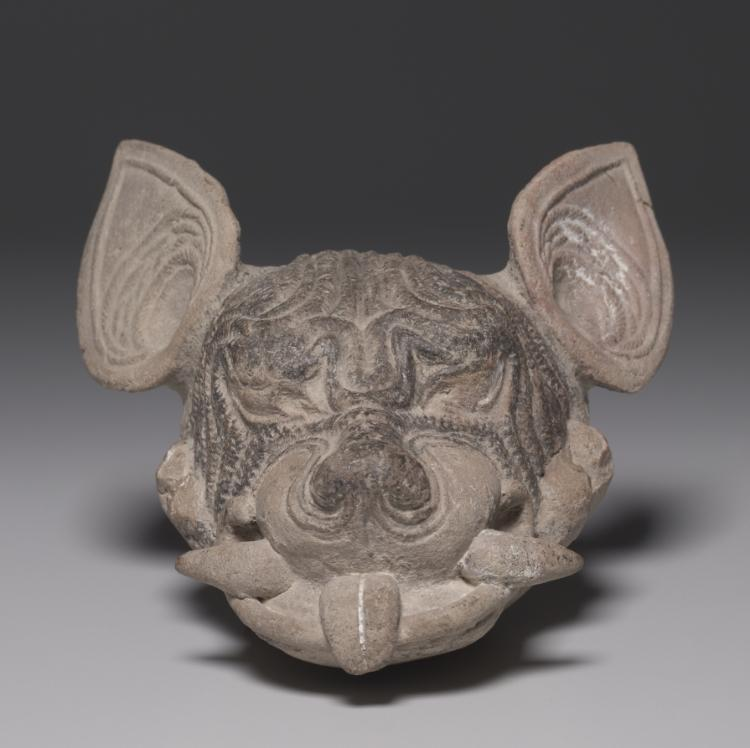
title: Dog Head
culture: Mexico, Gulf Coast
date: 500–1000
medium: earthenware, asphalt and resin paint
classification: Sculpture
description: This dog's snarl and protruding fangs lend him a sinister expression. Although pierced for suspension, the head seems too large and fragile to have been a pendant. Press-molds, used to create the dog's face and ears, were commonly used in the Gulf Coast region, where asphalt occurs naturally and was applied to pottery as a paint after firing.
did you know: This ceramic was analyzed using thermoluminescence dating; it was fired between 900 and 1,500 years ago.